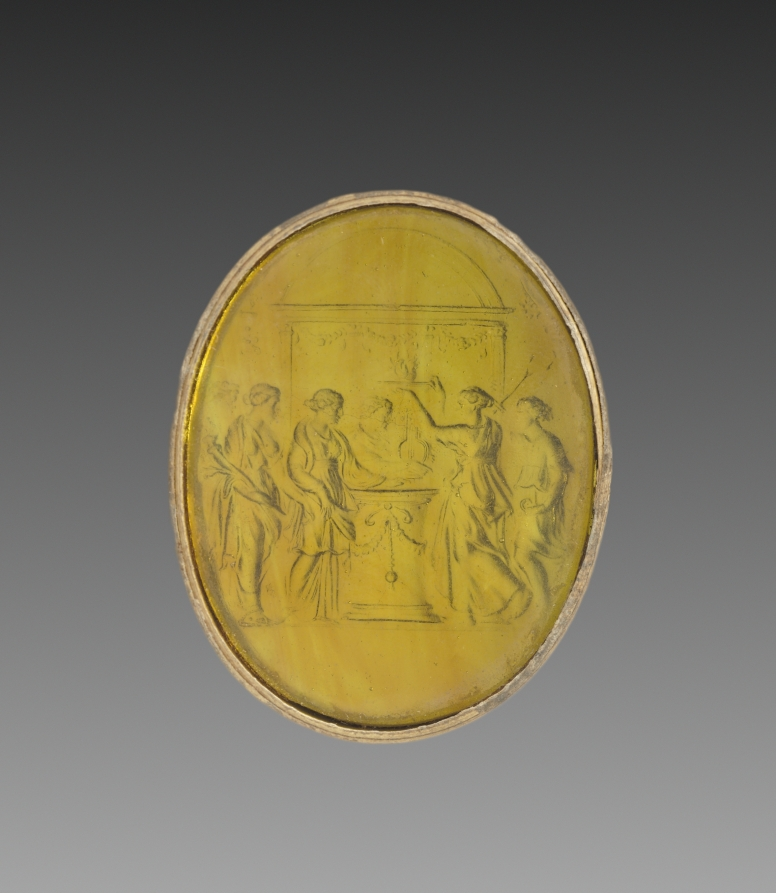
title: Intaglio: Classical Scene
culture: Italy (?), 18th century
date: 1700s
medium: glass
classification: Miscellaneous